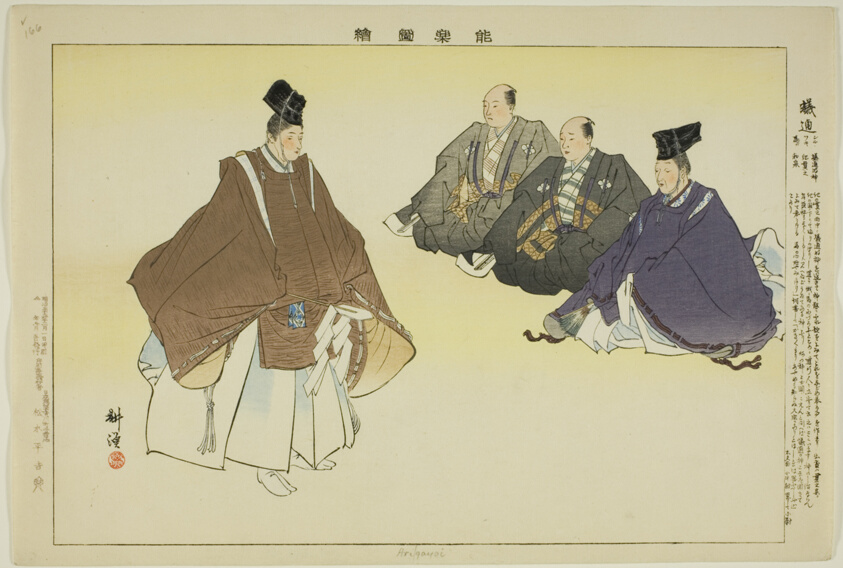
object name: Print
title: Arigayoi, from the series "Pictures of No Performances (Nogaku Zue)"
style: Japanese (culture or style)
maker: Tsukioka Kogyo; Japanese, 1869-1927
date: 1898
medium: Color woodblock print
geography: Japan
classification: woodblock print; print; asian art